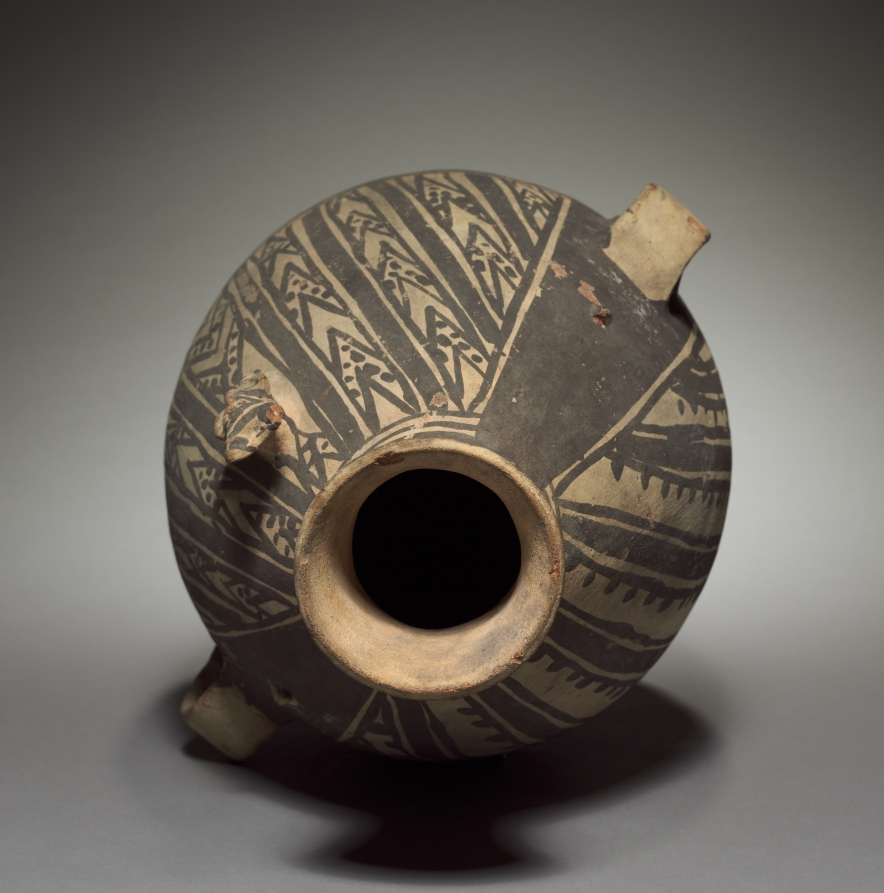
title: Bottle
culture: Peru, Chimú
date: 800–1500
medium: pottery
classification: Ceramic